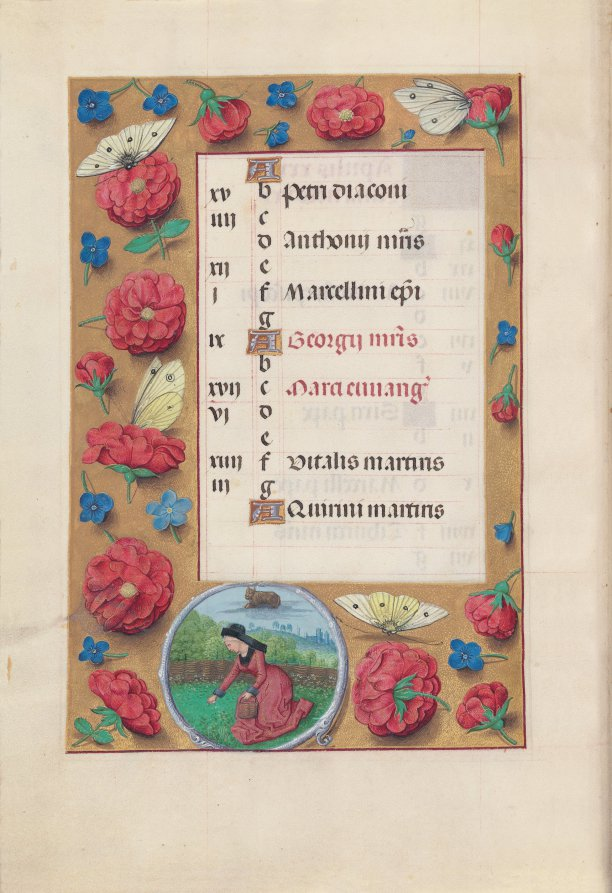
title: Hours of Queen Isabella the Catholic, Queen of Spain: Fol. 5v, April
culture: Flanders, Ghent and Bruges, late 15th century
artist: Master of the First Prayerbook of Maximillian (Flemish, c. 1444–1519)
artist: and Associates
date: c. 1500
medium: ink, tempera, and gold on vellum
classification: Bound Volume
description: This manuscript was illuminated by a circle of at least five highly organized manuscript painters active in the Flemish cities of Ghent and Bruges. The principal illuminator was Alexander Bening, who painted the majority of the book's miniatures. Manuscripts produced by this circle of artists are renowned for the decoration of their borders, which typically feature a rich variety of realistically painted flowers, birds, and butterflies. This prayer book, called a book of hours, was intended not for a cleric but for the private devotions of a lay person—in this case, Isabella the Catholic, Queen of Spain (1451–1504); her coat of arms embellishes the book's frontispiece. It is unlikely that the book was commissioned by the Queen herself; rather, she probably received it as a diplomatic gift from someone courting her patronage, perhaps Cardinal Francisco Jimenez de Cisneros. A Franciscan friar, Jimenez was dependent upon Isabella for his advancement, first to the post of Queen's confessor in 1492, and then to Archbishop of Toledo in 1495.